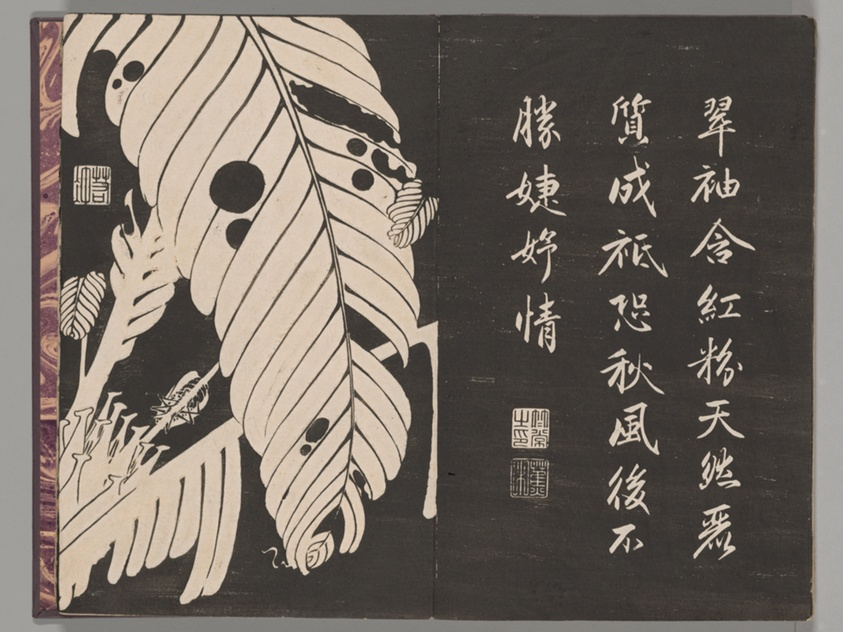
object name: Book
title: Soken sekisatsu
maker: Ito Jakuchu (Japanese, 1716-1800)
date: 1767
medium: Woodblock printed book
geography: Japan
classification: book